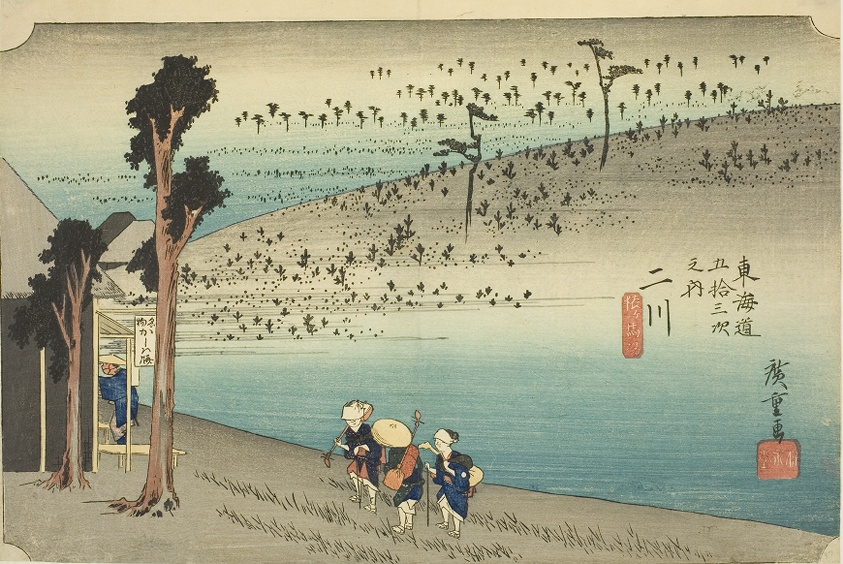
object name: Print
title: Futakawa: Sarugababa Plateau (Futakawa, Sarugababa), from the series "Fifty-three Stations of the Tokaido (Tokaido gojusan tsugi no uchi)," also known as the Hoeido Tokaido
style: Japanese (culture or style)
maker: Utagawa Hiroshige 歌川 広重; Japanese, 1797-1858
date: c. 1833/34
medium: Color woodblock print; oban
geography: Japan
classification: woodblock print; print; asian art